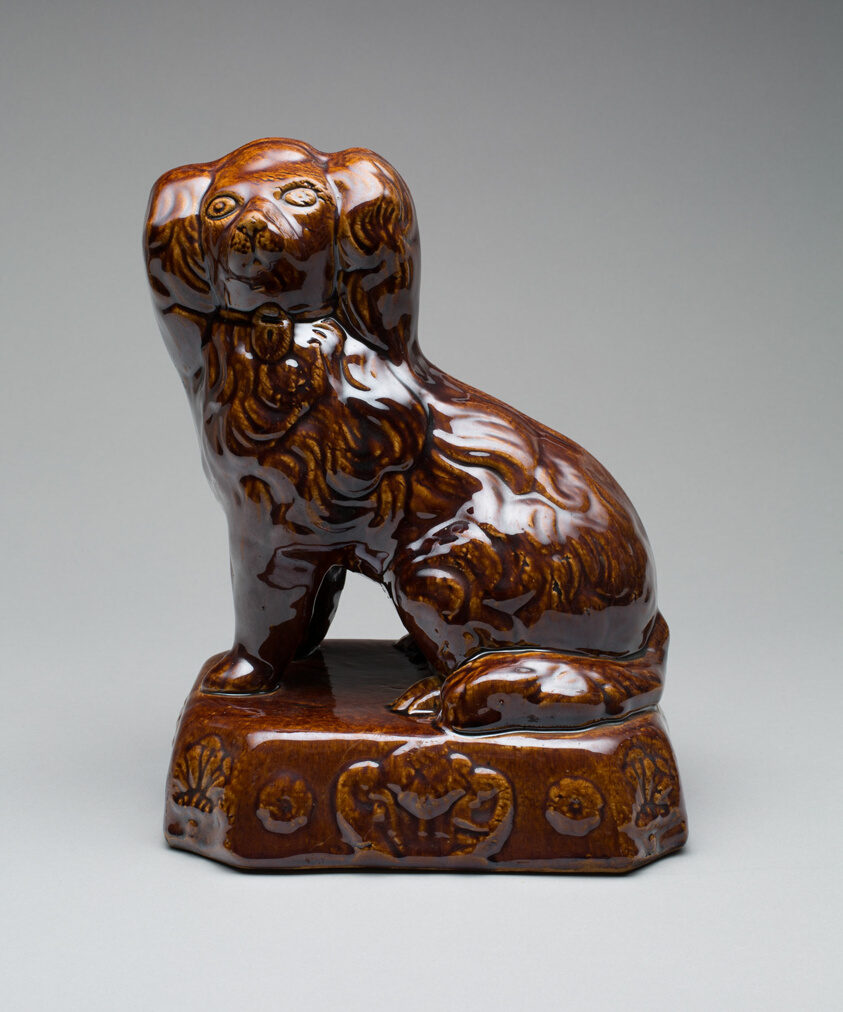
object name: Decorative Arts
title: Doorstop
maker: Artist unknown (American, 19th century); Possibly Ohio or New Jersey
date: 1840–60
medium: Earthenware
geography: Ohio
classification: decorative object/ornament; porcelain; american decorative arts; american arts; ceramics; decorative arts